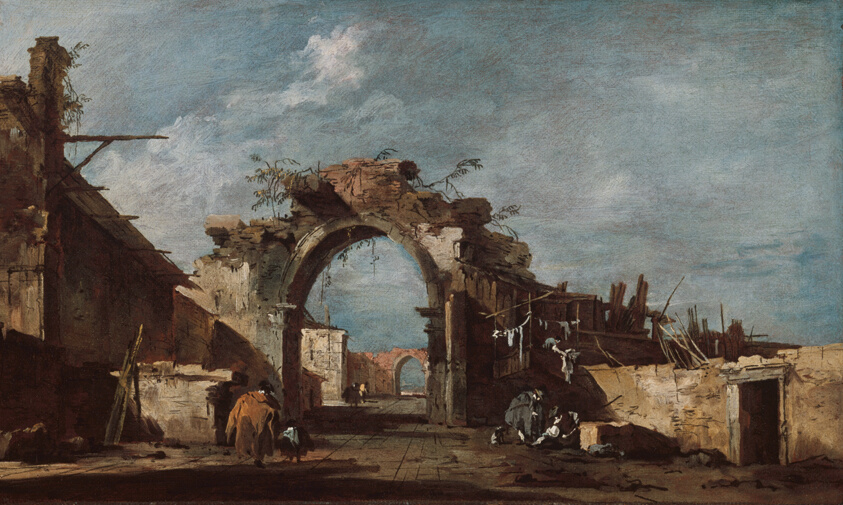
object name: Painting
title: Ruined Archway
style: 18th Century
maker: Francesco Guardi (Italian, 1712–1793)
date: 1775/93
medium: Oil on canvas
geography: Italy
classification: oil on canvas; Italian; oil paintings (visual works); paint; painting; european painting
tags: ruins, architechture, architecture, architecture, building, buildings, children, doorway, figure, figures, men, sky, Century of Progress, world's fairs, Chicago World's Fairs